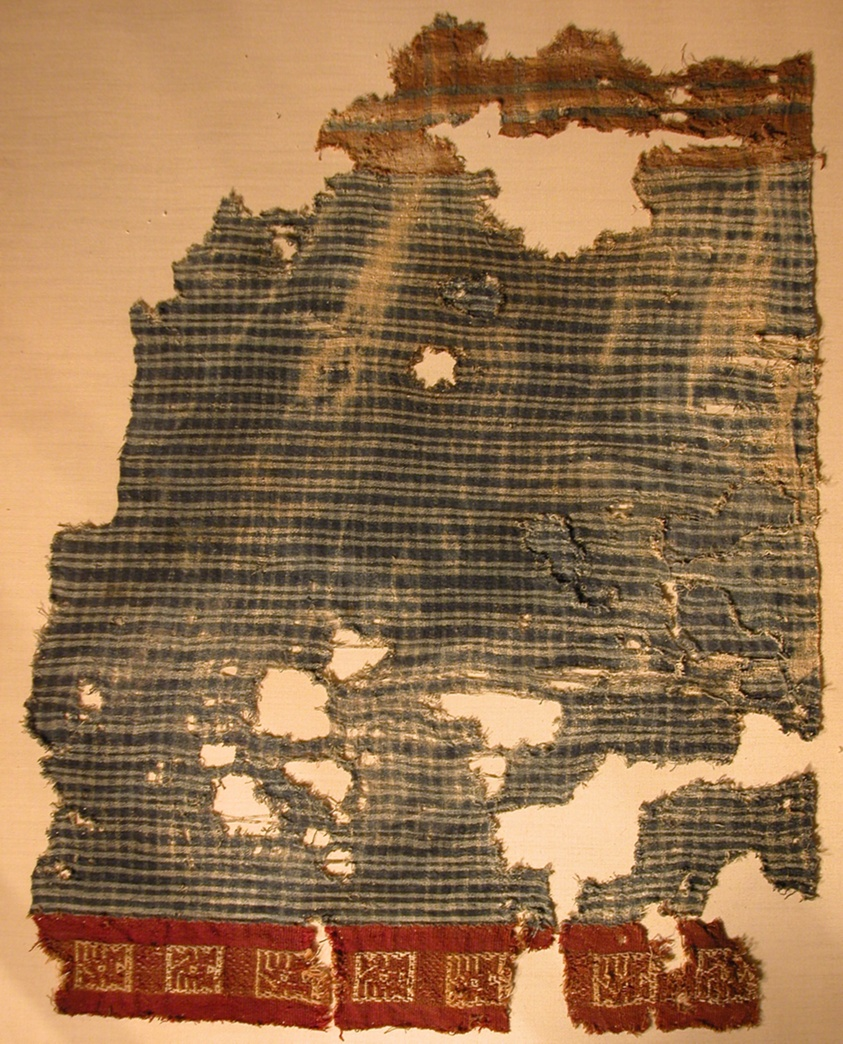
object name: Textile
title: Fragment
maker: Peru, north coast, Culebra Valley, La Capilla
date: A.D. 1000/1476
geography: Peru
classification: textile; weaving